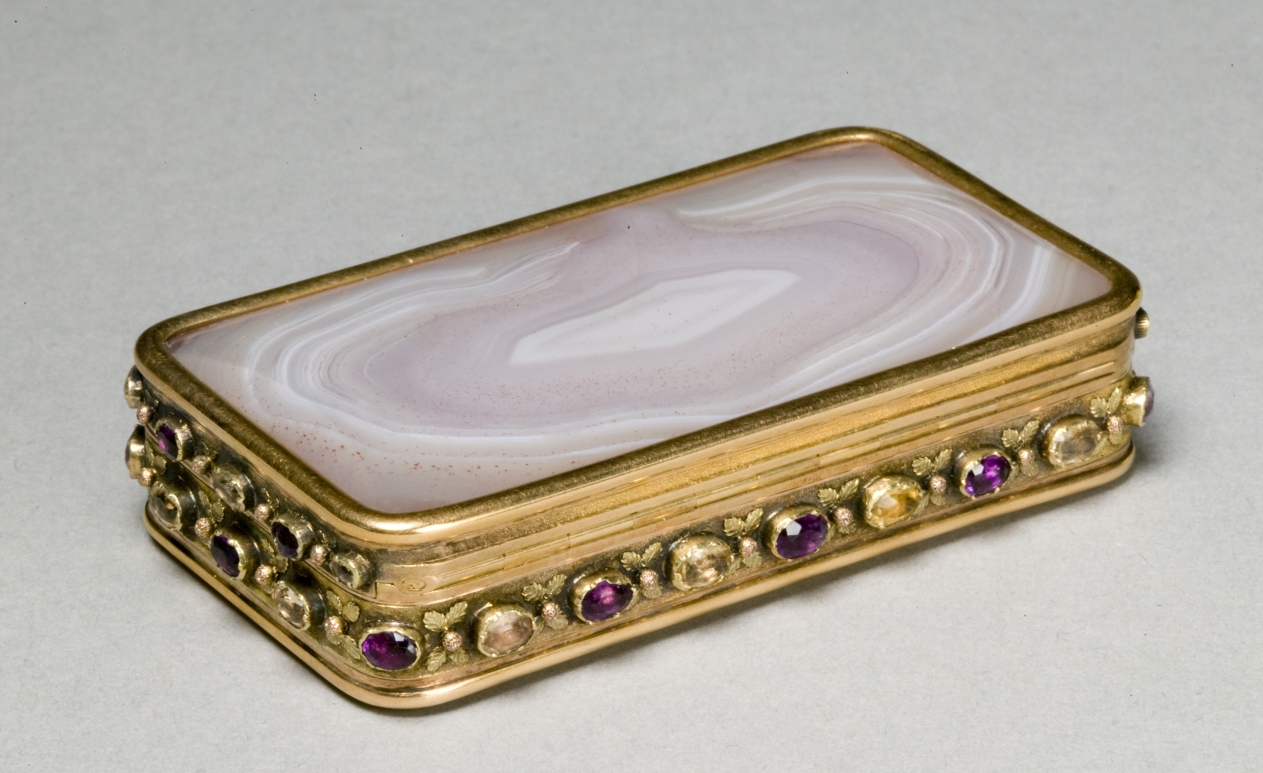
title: Snuff Box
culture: Switzerland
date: c. 1825–35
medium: agate, gold, amethysts, citrines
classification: Miscellaneous